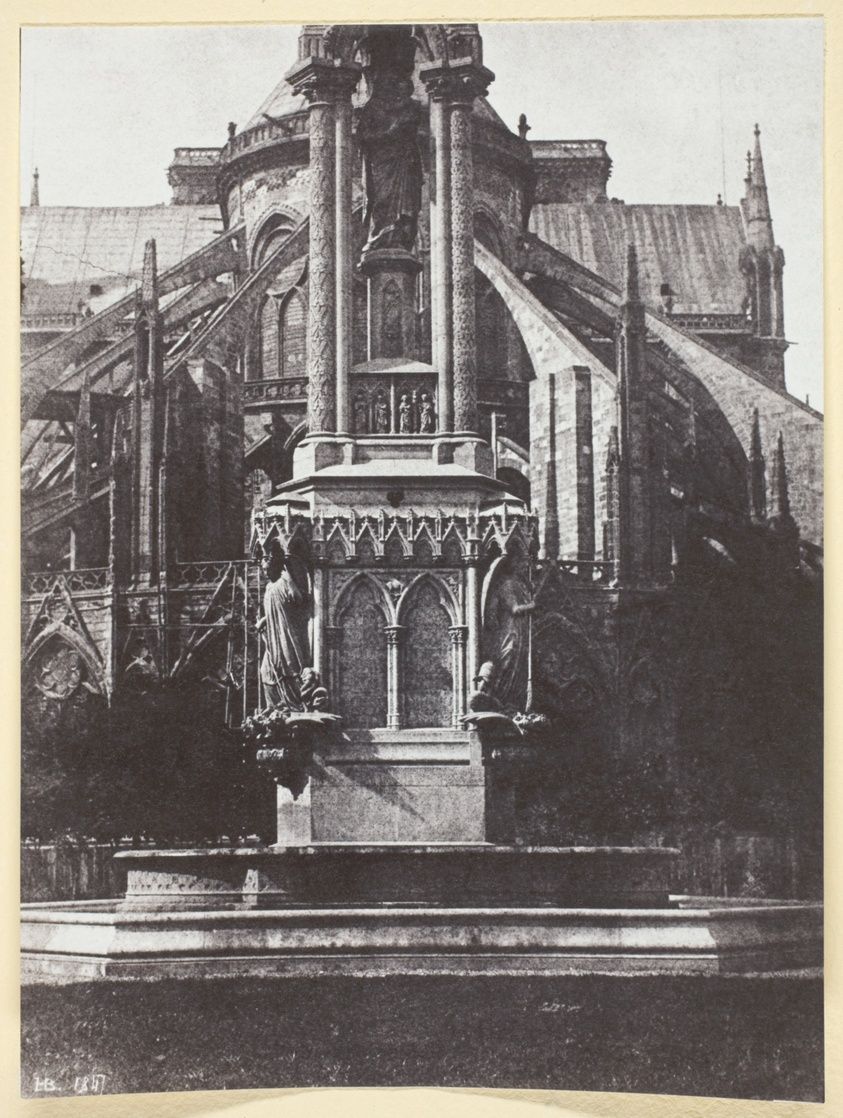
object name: Photograph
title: La Fontaine du square de l'Archevêché; Derrière Notre-Dame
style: 19th century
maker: Hippolyte Bayard (French, 1801–1887)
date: 1847, printed 1965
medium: Gelatin silver print, No. 19 from the portfolio "Bayard: XXV Calotypes, 1842-1850" (1965);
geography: France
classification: photographic process; photography; photograph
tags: Collected by Hugh Edwards